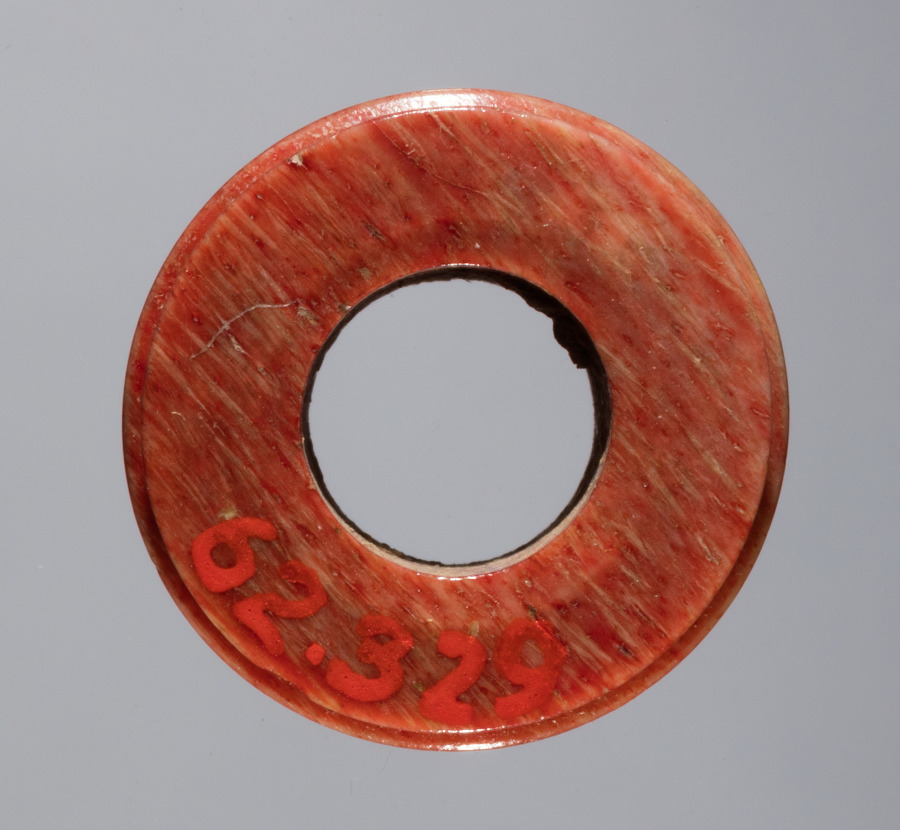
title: Spindle Whorl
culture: Iran, early Islamic period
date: 700s - 900s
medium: bone, incised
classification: Spindle Whorl